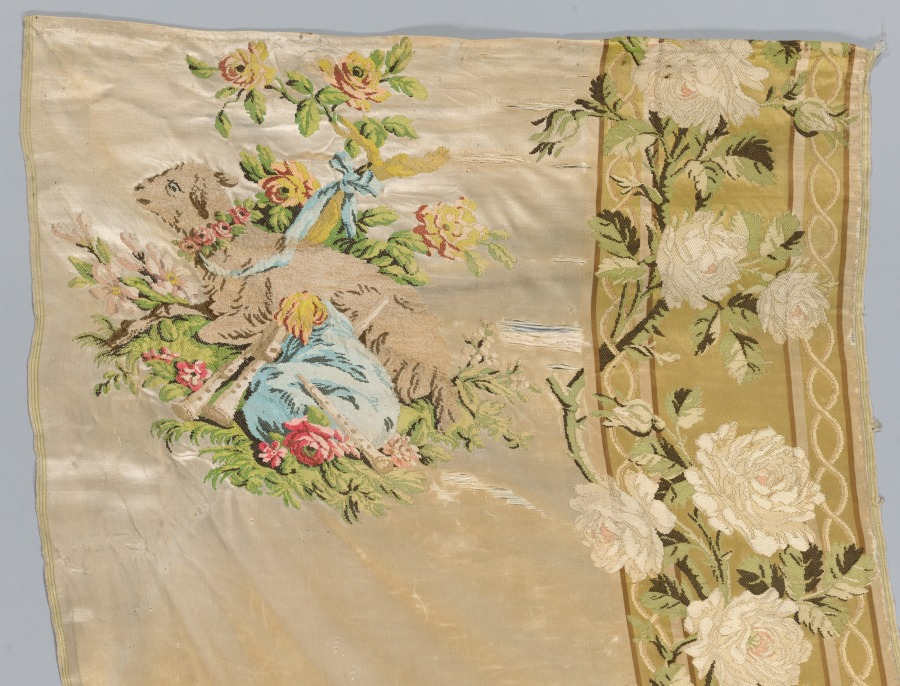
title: Length of Brocaded Satin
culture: France, 18th century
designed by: Philippe de Lasalle (French, 1723–1805)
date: c. 1780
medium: satin, brocaded; silk with areas of chenille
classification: Textile